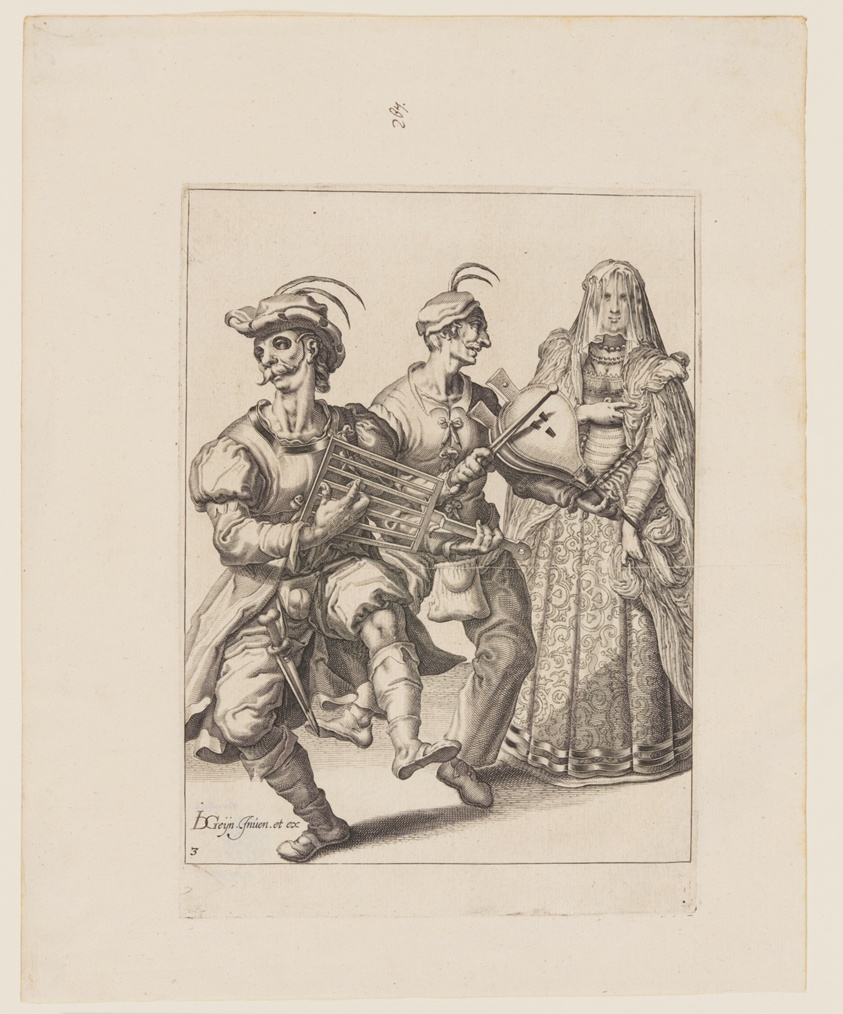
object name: Print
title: A Veiled Woman with Two Musicians Playing a Gridiron and a Bellows, from The Masquerades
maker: Jacques de Gheyn II; Dutch, 1565–1629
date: 1595-96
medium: Engraving on ivory laid paper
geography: Netherlands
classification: engraving; paper; print; prints and drawing